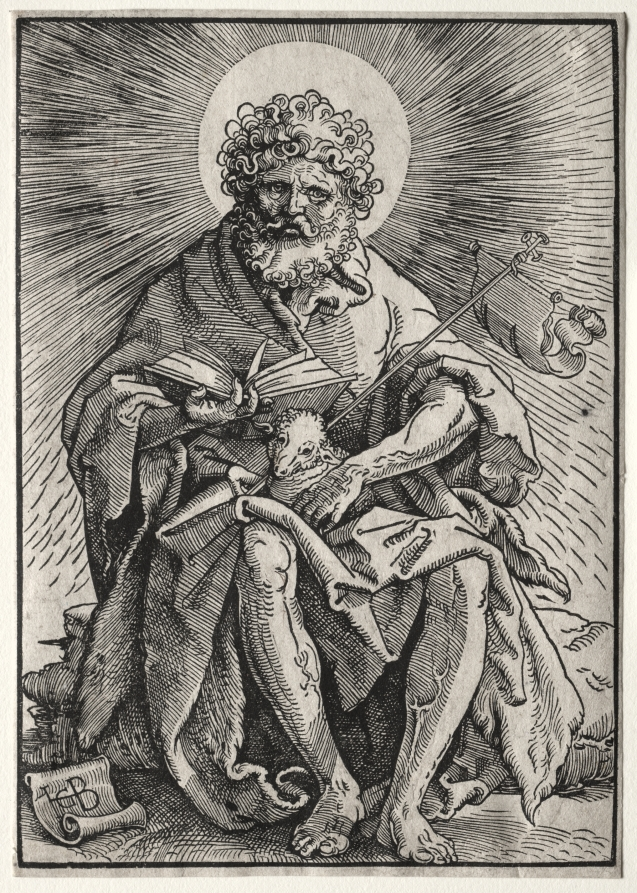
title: St. John the Baptist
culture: Germany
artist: Hans Baldung (German, 1484/85–1545)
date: ca. 1518–19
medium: woodcut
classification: Print